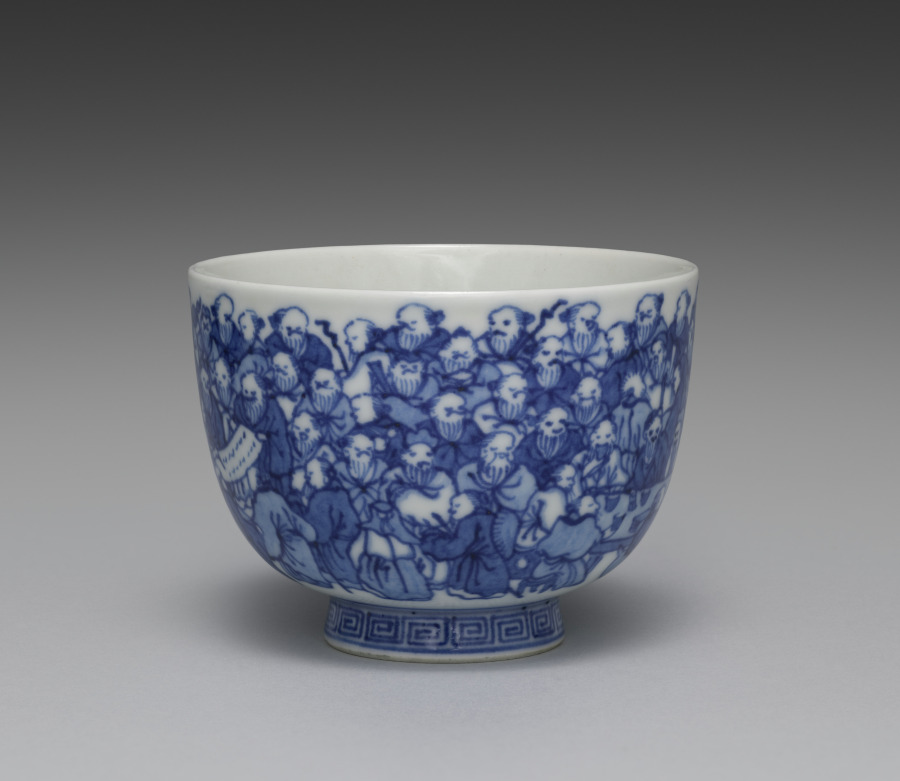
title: Teacup from Teacups with a Hundred Sages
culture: Japan, Meiji period (1868–1912)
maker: Seifū Yohei III (Japanese, 1851–1914)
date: 1893–1914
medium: One from a set of five teacups; porcelain with underglaze blue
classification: Ceramic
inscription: 清風造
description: Each of these five teacups has a painting of identical design in underglaze blue, but as the tiny figures are drawn entirely by hand, each cup has its own personality. The theme of the sencha cups is an assembly of sages or immortals, literally “a hundred venerable [people]” (hyakurō). The myriad figures crowd the scene in groups. The god of longevity, with his tall forehead, sits with his cranes, having flown in from Mt. Penglai on the Isle of the Immortals. Seven long-bearded sages sit around a stone table, chatting and drinking; one is seated on an enormous gourd. Of course, there is a stack of books on the table, and elsewhere, scrolls are being written upon or read—in one case held very close by a sage who is wearing glasses. The design was enormously popular in ceramics made for those engaged in literati culture.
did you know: Seifū Yohei III (1851–1914) produced many works for tea gatherings where people drank Chinese-style leaf-tea (sencha).